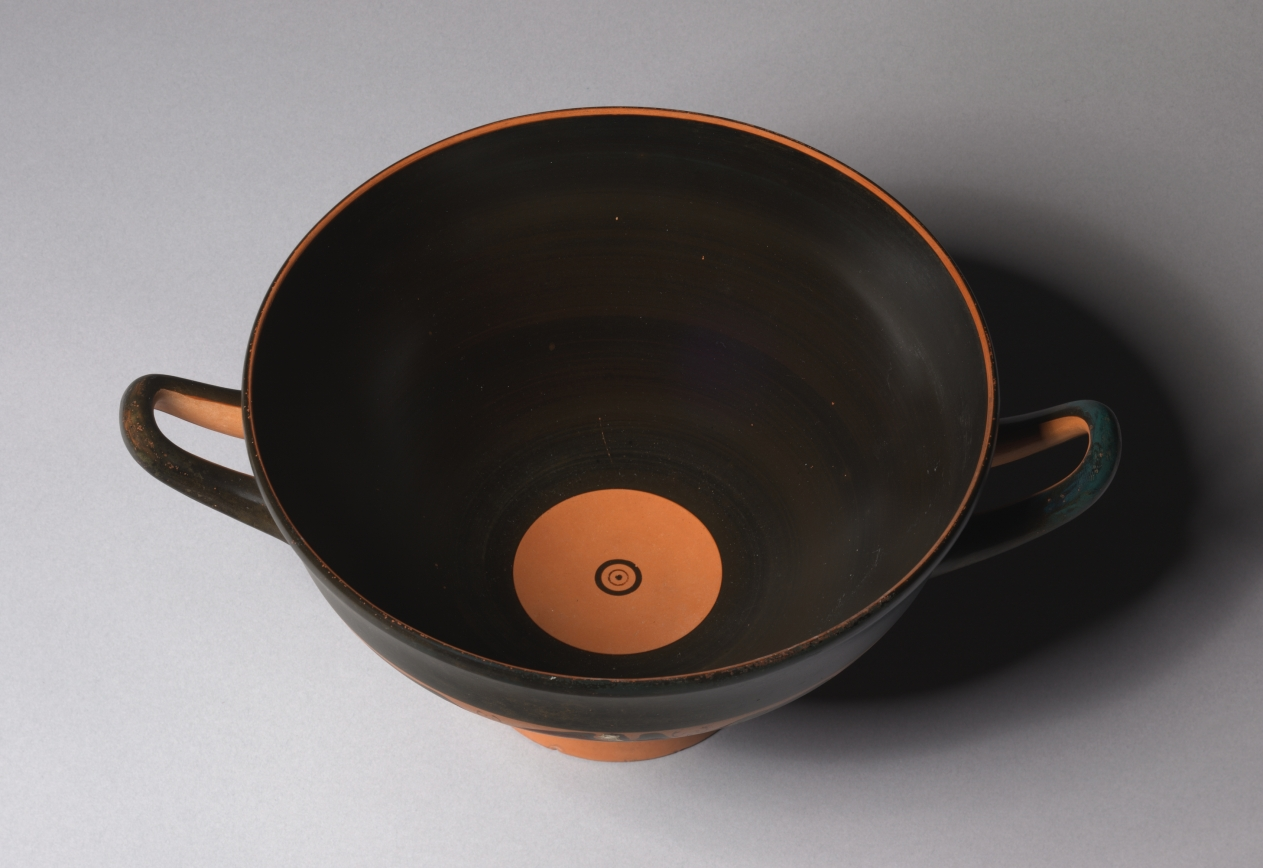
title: Black-Figure Band Skyphos (Drinking Cup): Sirens, Stags, and Panthers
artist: attributed to Group of Rhodes 11941 (Greek, Attic)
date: c. 540 BCE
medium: ceramic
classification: Ceramic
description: A siren, a mythological woman-headed bird, stands at the center of the figural band on either side of this cup, her wings spread and head turned to the left. Flanking her are a pair of grazing stags, with a panther on either side facing inward. Inside, the cup is sparsely decorated, its reserved tondo holding a dot within concentric circles.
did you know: Three of four stags on this cup each appear to have just one ear.